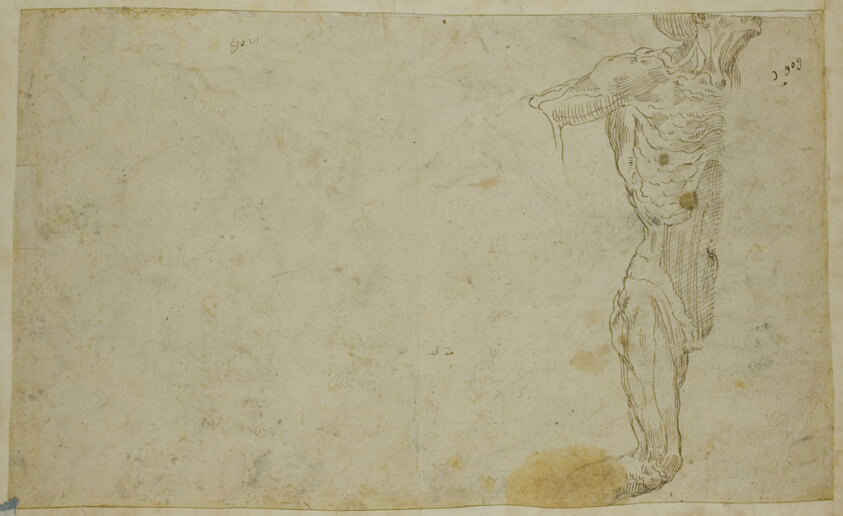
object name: Drawing and Watercolor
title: Cavalry Skirmish (recto); Kneeling Ecorché (verso)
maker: Francesco de'Rossi, called Salviati; Italian, 1510-1563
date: 1530/39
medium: Pen and brown ink with brush and gray wash, over black chalk, with later additions of brown wash in lower right, on ivory laid paper, edge mounted to cream laid paper, hinged on ivory wove card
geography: Italy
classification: ink with wash; drawings (visual works); prints and drawing